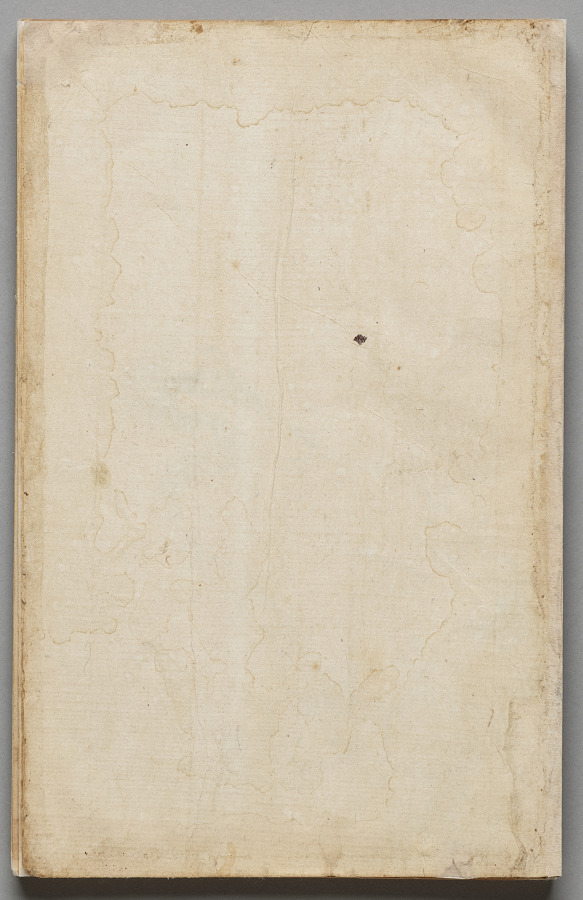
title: Sketch Book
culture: Japan, Edo period (1615–1868) to Meiji period (1868–1912)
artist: Kawanabe Kyōsai (Japanese, 1831–1889)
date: mid- to late 1800s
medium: Accordion-style book of 26 double-leaves; ink and color on paper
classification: Bound Volume